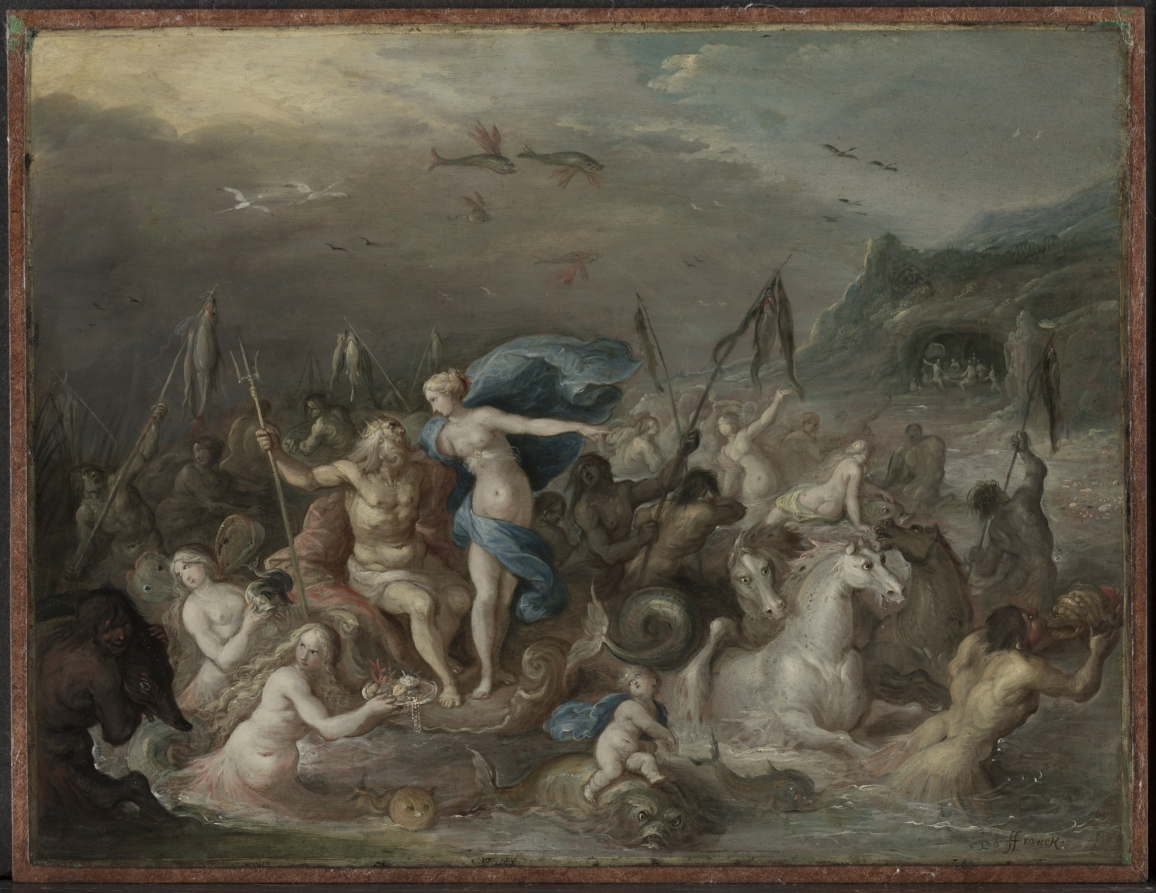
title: The Triumph of Neptune and Amphitrite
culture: Flanders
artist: Frans Francken (Flemish, 1581–1642)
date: 1630s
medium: oil on copper, mounted on wood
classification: Painting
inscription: signed lower right: D.O. ffranck. f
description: Neptune—the Roman god of water—and his wife, Amphitrite, ride a chariot pulled by sea horses. Water fowl and flying fish glide in the sky above them, while in the distance a group of nymphs beckon from a grotto. Neptune’s trident represents his power over water and storms; the fish, shells, coral, and pearls carried by his subjects show his wealth.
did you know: The smooth surface of the copper panel highlights Francken's delicate painting technique.